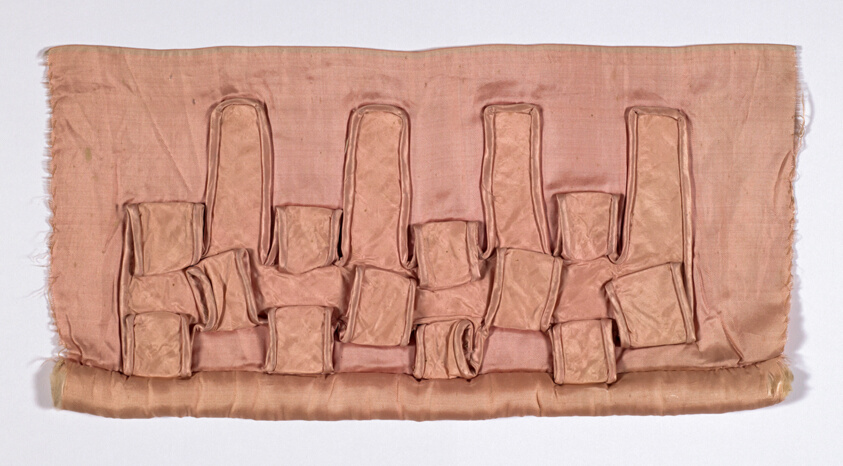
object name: Textile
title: Sample (Dress Trimming)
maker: England or France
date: 1815/35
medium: Silk, twill weave; appliquéd with silk, plain weaves; edged with cording covered with silk, satin weaves; turned and padded (cotton) hem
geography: France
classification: textile; costume; needlework - costume; weaving